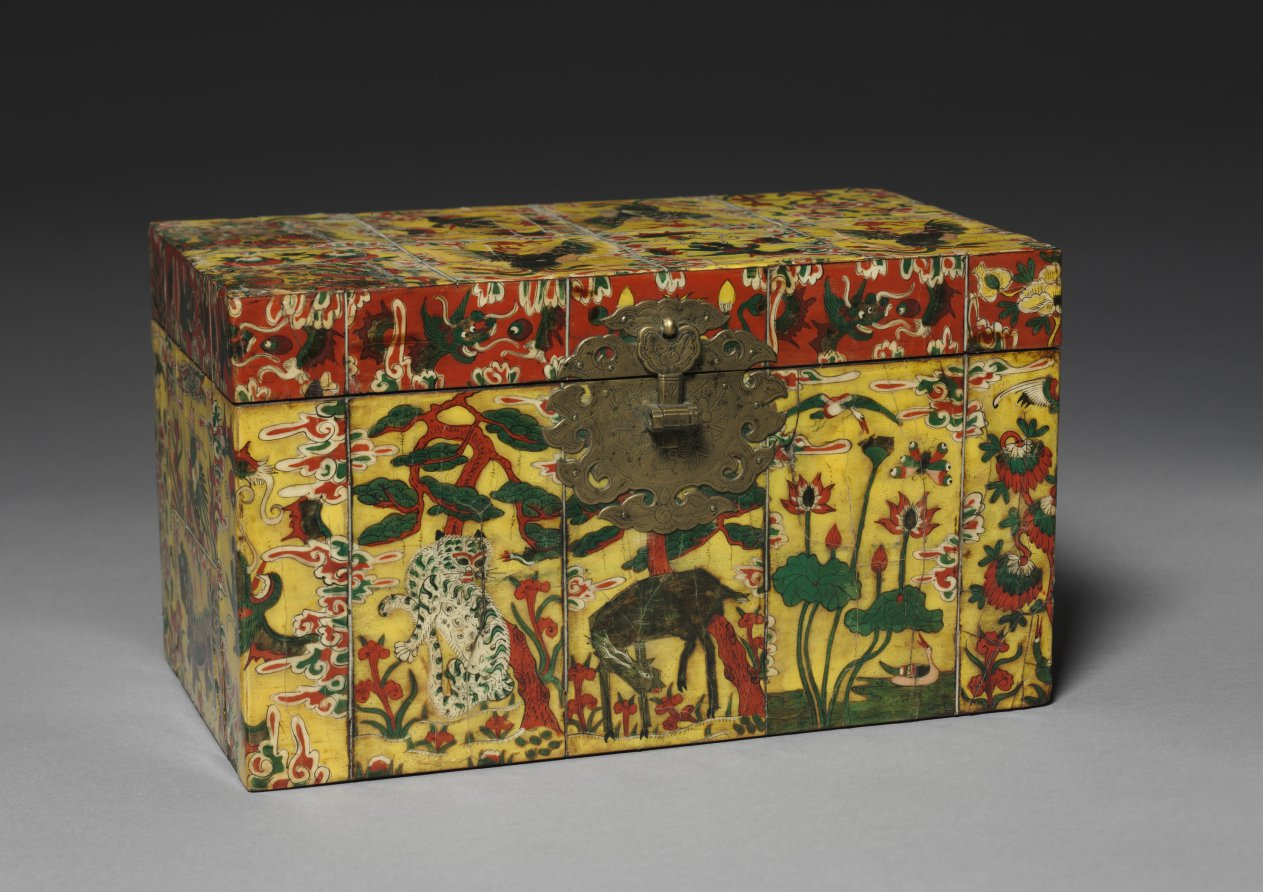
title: Box with Painted Oxhorn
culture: Korea, Joseon dynasty (1392–1910)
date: 1800s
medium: painted wood with flattened ox-horn inlay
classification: Miscellaneous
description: This box is colorfully decorated with the technique of oxhorn plating. The oxhorn was cut, soaked in water, boiled, and then pressed into thin translucent sheets. Since oxhorns are usually rather small, dozens of them were required to fully decorate even a small wooden object. This box is colorfully painted with the imagery of auspicious plants and animals such as dragons amid clouds, a white tiger under the pine tree, a grazing deer, and more. This kind of luxurious box was probably produced as a wedding gift.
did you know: This box is made of small flattened pieces of oxhorn. Since oxhorn is usually rather small, possibly dozens of them were used to fully decorate even a small wooden object like this box.